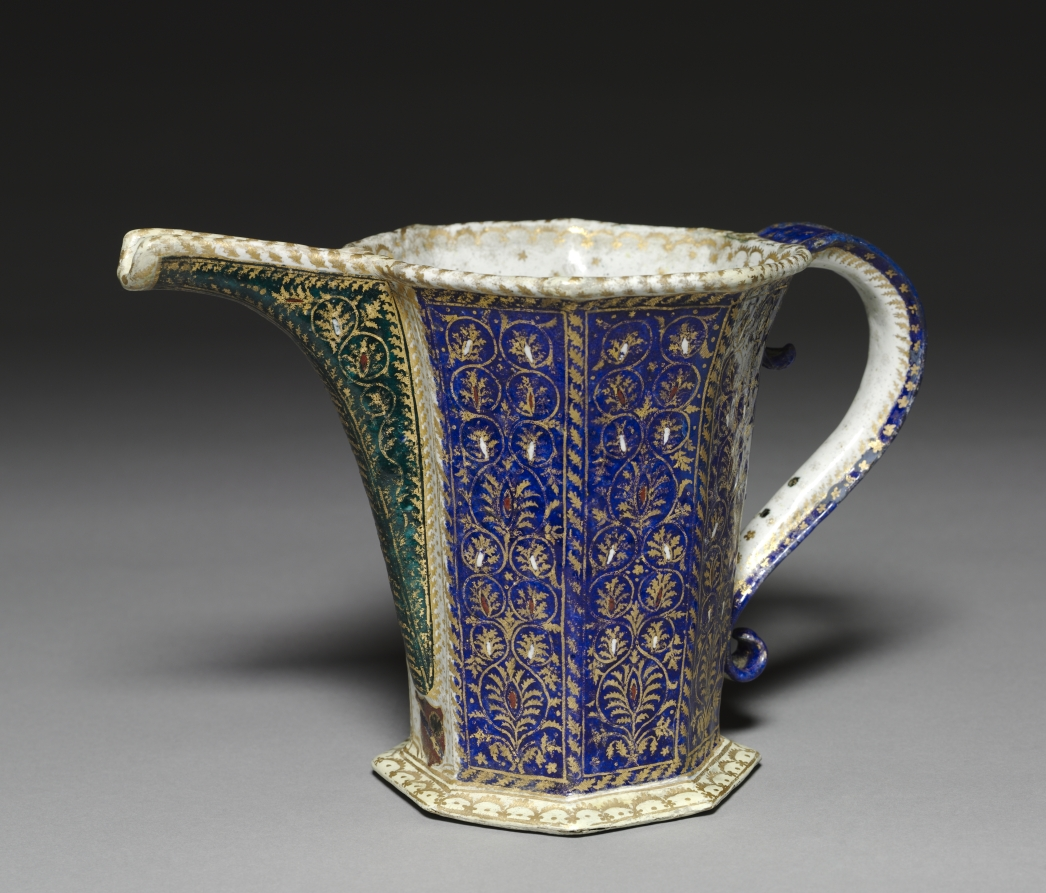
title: Ewer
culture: Italy, Venice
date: c. 1500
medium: painted enamel on copper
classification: Enamel